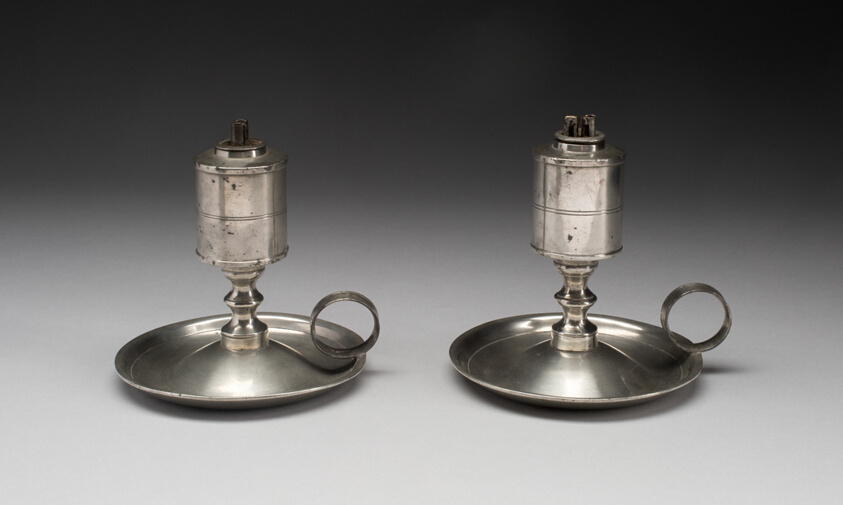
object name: Decorative Arts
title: Pair of Lamps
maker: Roswell Gleason (American, 1799–1887)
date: 1822–50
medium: Pewter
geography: United States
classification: metalwork; american decorative arts; american arts; decorative arts